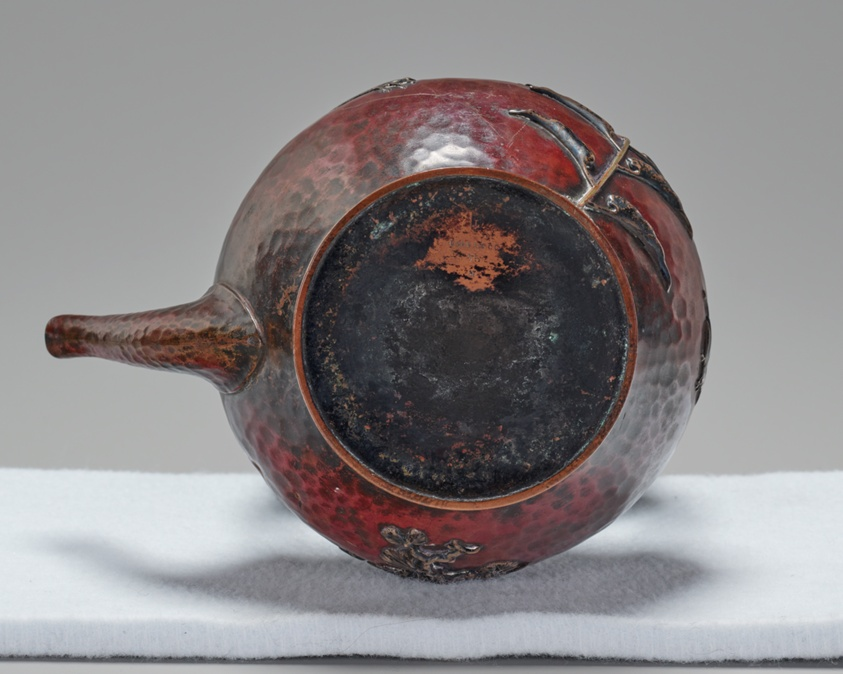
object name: Decorative Arts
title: Tea Kettle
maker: Gorham Manufacturing Company (American, founded 1831); Providence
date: c. 1900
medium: Copper, mixed metals, and wood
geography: Providence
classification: american decorative arts; decorative arts